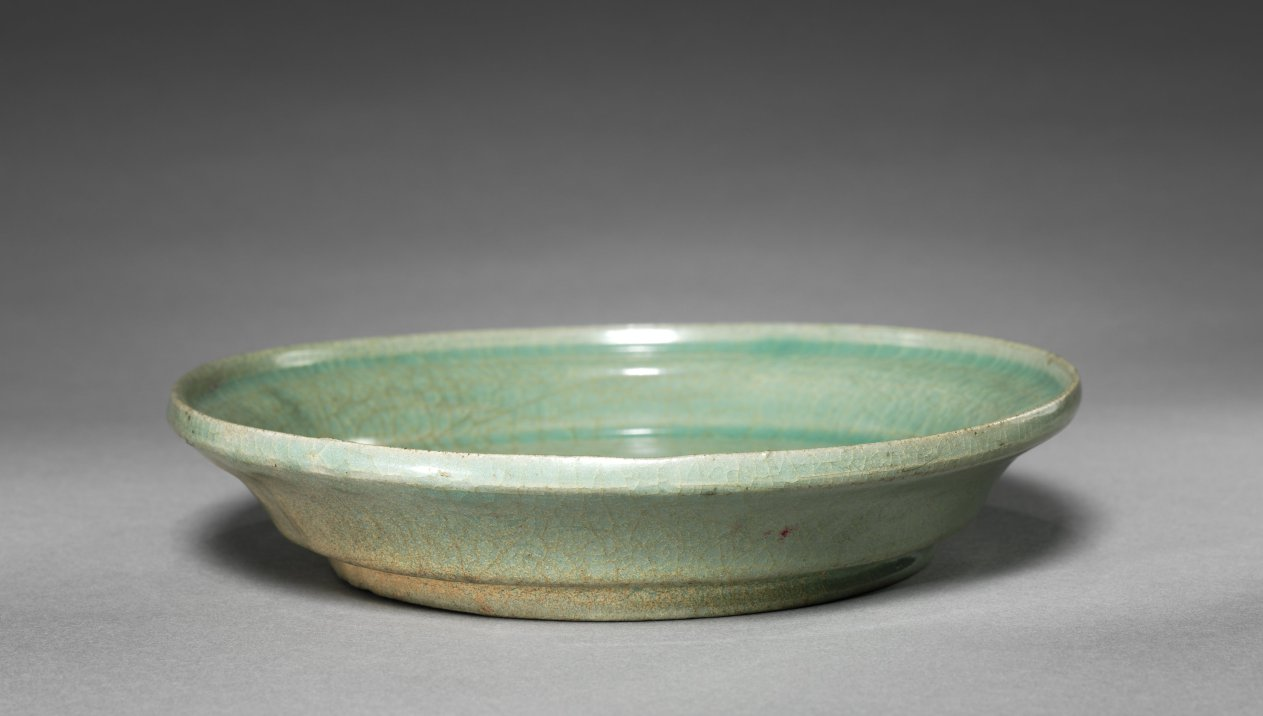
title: Saucer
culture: Korea, Goryeo dynasty (918–1392)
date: 1100s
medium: pottery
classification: Ceramic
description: As early as the seventh century, the practice of drinking tea and wine became an important part of elite culture in Korea. Elites of the Goryeo period commissioned a variety of types of utensils and vessels including this saucer paired with a large bowl, to make their drinking experience more exciting.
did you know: The crackle pattern that appears all over this saucer was caused by a thermal expansion mismatch between the body and the glaze.